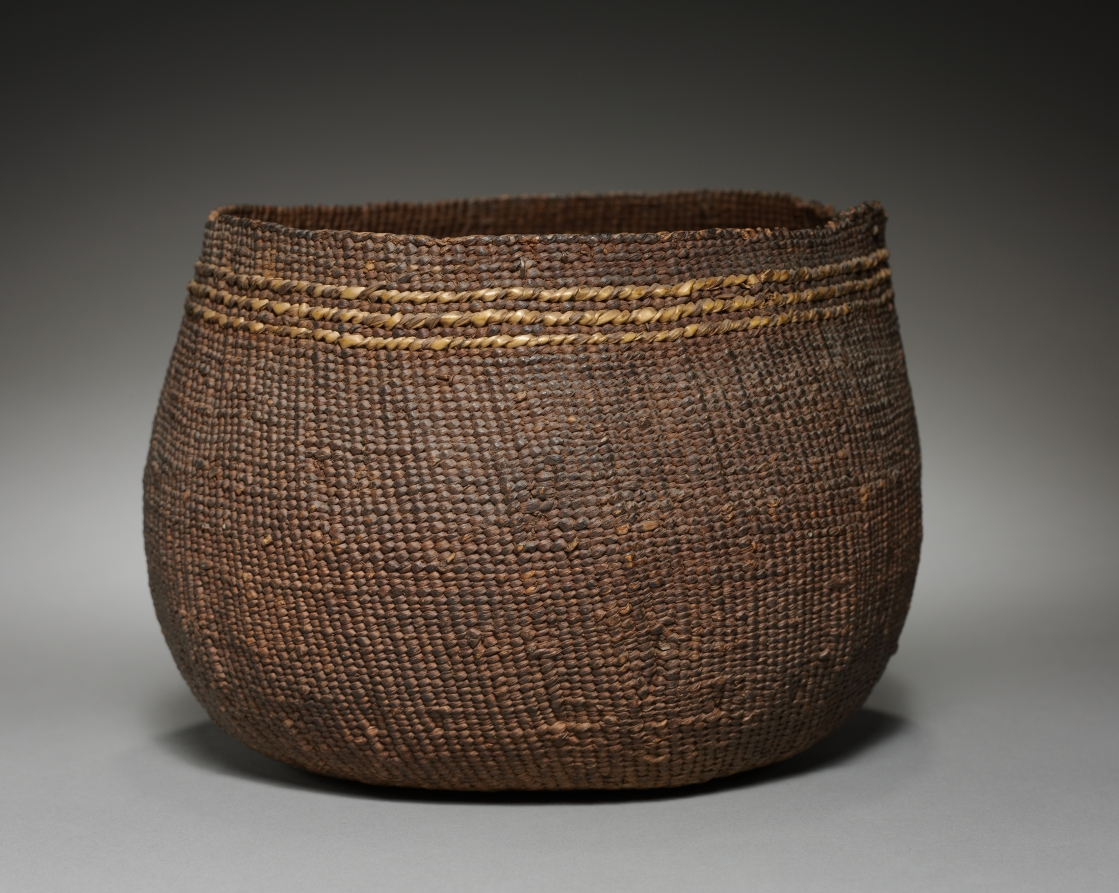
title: Cooking Bowl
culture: California (?), Native American, Unassigned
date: before 1927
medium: twined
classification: Basketry